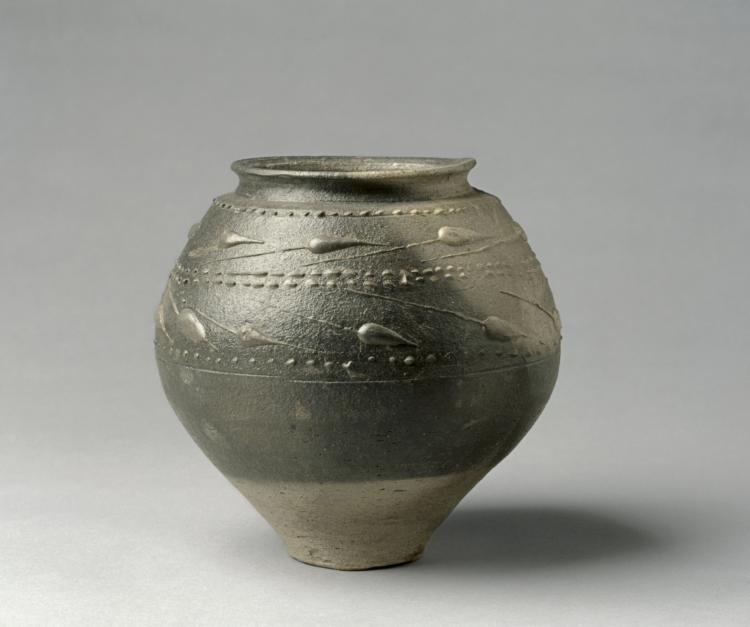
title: Globular Pot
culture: Rhenish (Cologne), Gallo-Roman, 2nd quarter 1st Century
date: 25–50 CE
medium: gray ware with black burnished slip and Barbotine decoration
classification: Ceramic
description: This pot is decorated with a pattern of leaves arranged in two rows, separated by parallel lines of dots. The vessel was thrown on a potter’s wheel and covered in a dark slip, leaving about two inches above the foot bare. After the Romans occupied Gaul (modern day France and Belgium) in the 1st century BCE, pots like this one with dark brown or black slips became increasingly popular in the northern provinces of the Roman Empire.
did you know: This pot’s decoration was applied using the barbotine method, in which a reed or horn is used to pipe clay slip onto the surface.